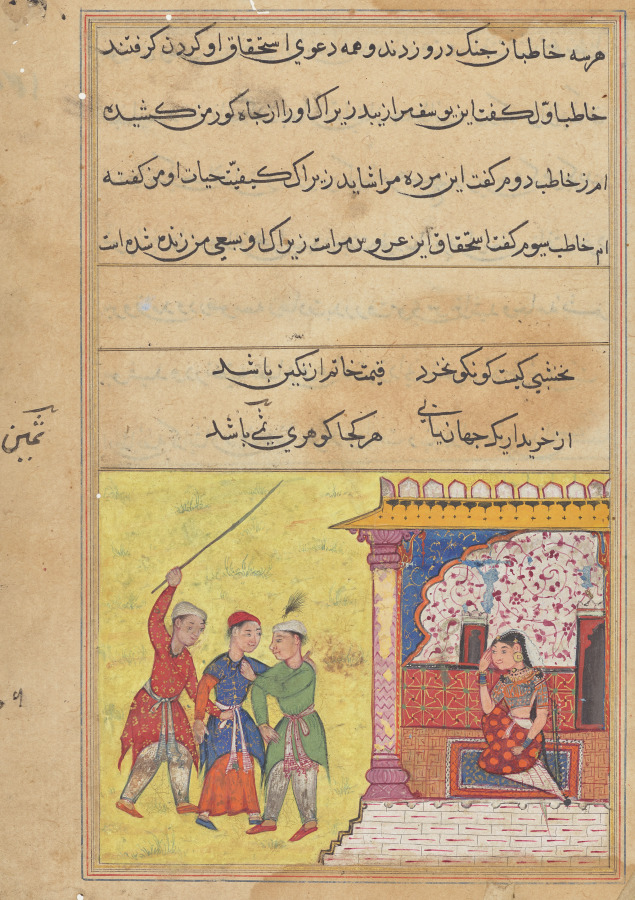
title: The three suitors again begin to quarrel among themselves for the hand of the devotee’s daughter, from a Tuti-nama (Tales of a Parrot): Twentieth Night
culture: Mughal India, court of Akbar (reigned 1556–1605)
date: c. 1560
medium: gum tempera, ink, and gold on paper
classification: Painting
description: After working together to revive the woman from her death-like illness, the three suitors resume their rivalry. The men brawl in the courtyard while she looks on from her chamber. Horrified by the behavior of her suitors, she renounces worldly matters, joins a temple, and devotes herself to serving god.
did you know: When the daughter joins the temple, she will shave her head and don woolen clothing.